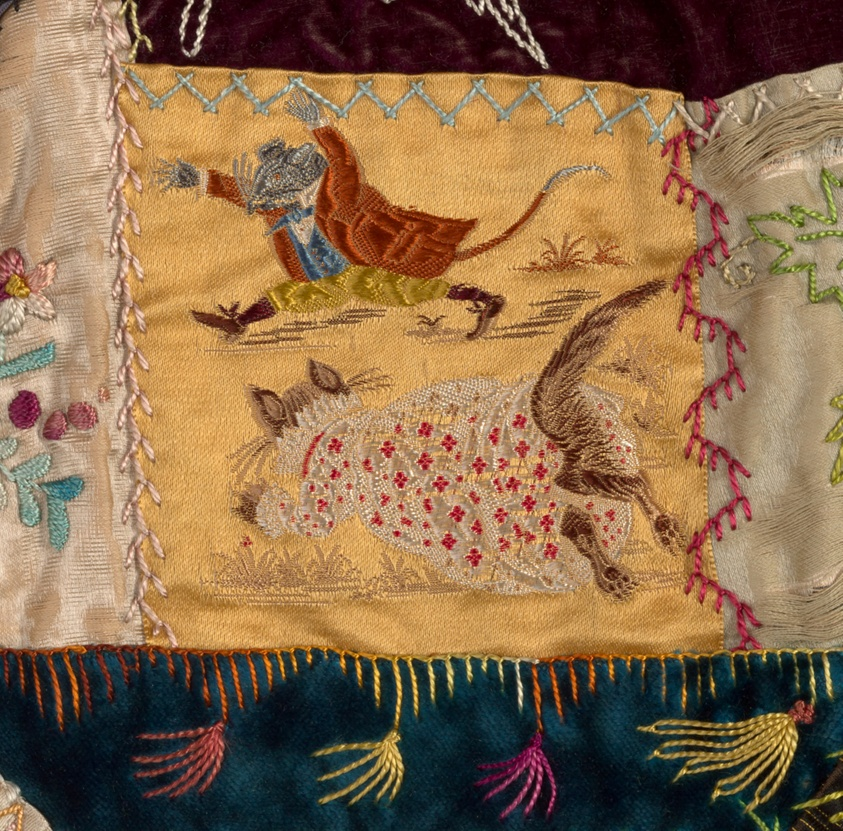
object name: Textile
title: Parlor Throw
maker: American, possibly Illinois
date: c. 1890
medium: Pieced, embroidered and painted “crazy” quilt; dyed and printed silk plain, satin, pile and patterned weave fabrics and ribbons; silk and metallic embroidery threads; paint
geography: Illinois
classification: needlework - quilt; textile